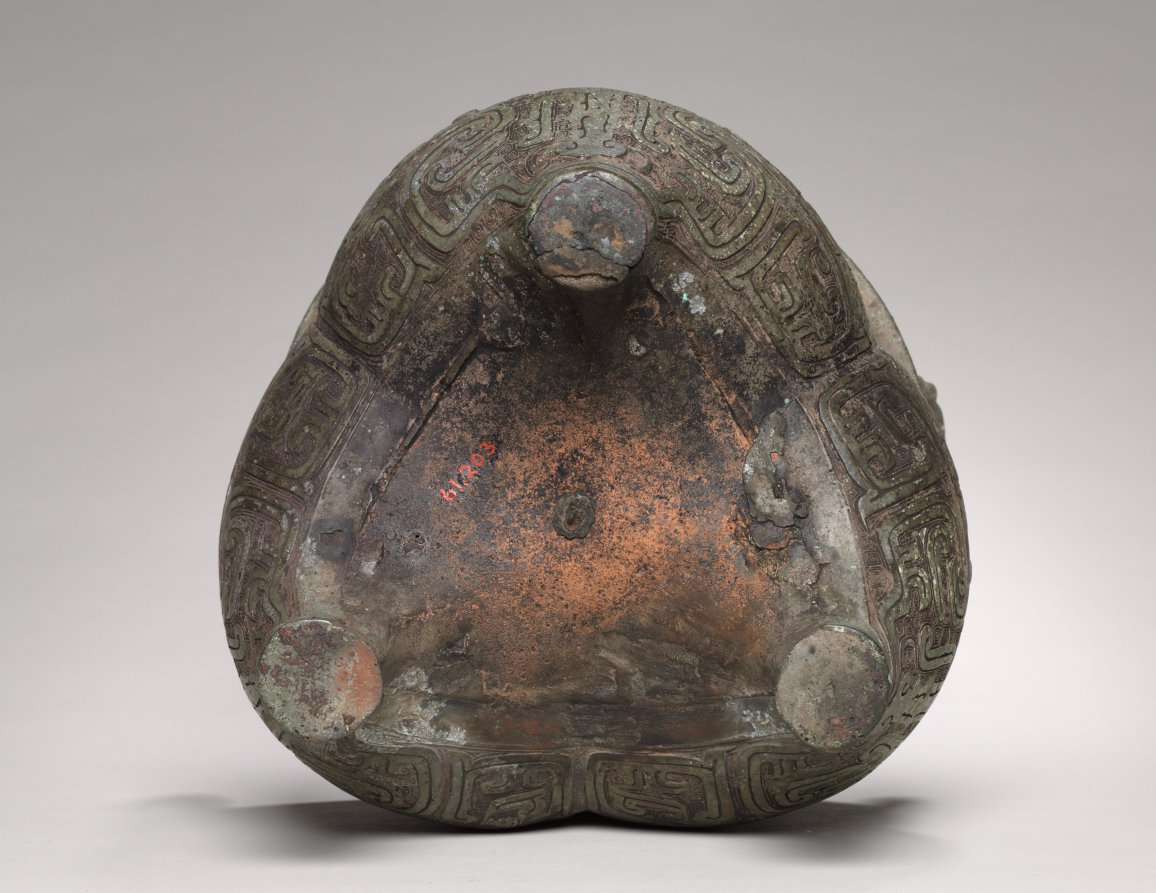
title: Hollow-Legged Tripod (Li Ding)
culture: China, Shaanxi province, Xi'an, Western Zhou dynasty (c. 1046–771 BCE)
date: late 900 BCE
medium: bronze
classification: Metalwork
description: This food vessel exhibits a new decorative trend of metropolitan Western Zhou foundries. Zoomorphic images became increasingly abstract and subject to linear elaboration. The dominating animal mask (taotie) of the Shang is here transformed, dissolved, and dissected into intricate patterns of curving bands and median grooves. The design is abstract but not devoid of symbolic contents and functions. A smooth and even gray-green patina--the result of natural corrosion during burial--covers the outside and creates a new visual impact on the surface decoration.